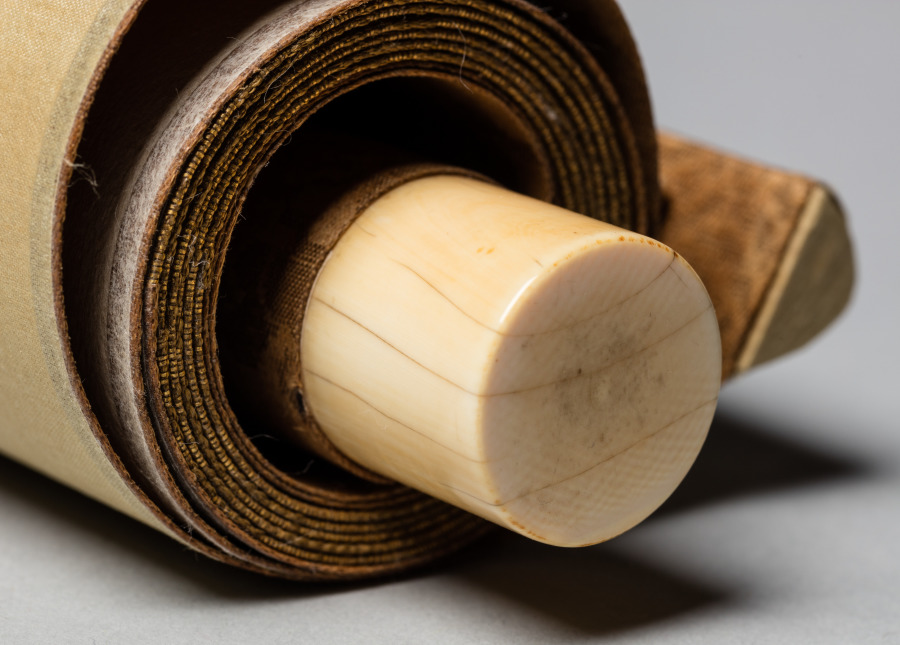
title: Chinese Literatus Traveling to a Mountain Temple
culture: Japan, Muromachi period (1392–1573)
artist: Kano Hidemasa (Japanese, active late 1500s)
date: late 1500s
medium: hanging scroll; ink and light color on paper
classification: Painting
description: This painting bears the seal of Kano Hidemasa, believed to be the son of Kano Hideyori (active mid- to late 1500s) of the important and prolific Kano family of painters. It features a traveler and his servant in a Chinese setting. The two are on their way to a temple up the stairs, climbing the steep slope of the mountain ahead of them. The traveler, who wears clerical garb, has paused to admire and listen to the sound of a nearby waterfall. The painting is a charming interpretation of a scene that might be found in Song dynasty album leaves imported to Japan.